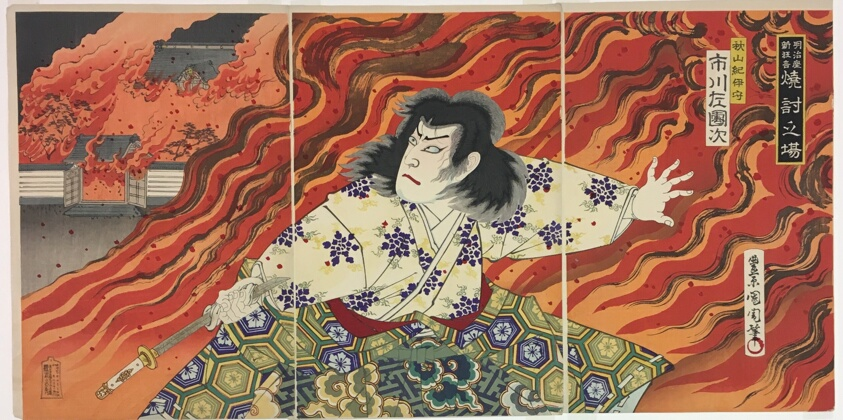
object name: Print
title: Actor Ichikawa Sadanji I as Akiyama Kii no Kami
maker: Toyohara Kunichika (Japanese, 1835-1900)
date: 1894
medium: Color woodblock print, oban triptych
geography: Japan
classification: woodblock print; print; asian art